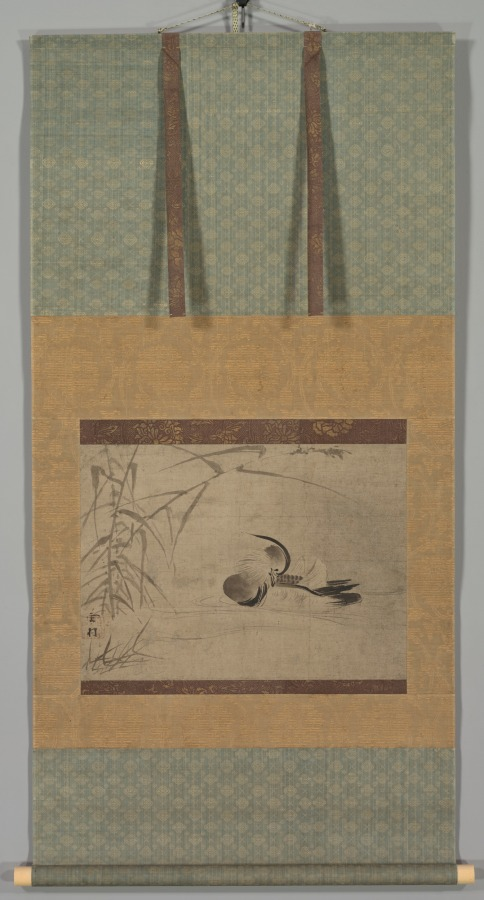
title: Mandarin Duck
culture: Japan, Muromachi period (1392–1573)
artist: Sesson Shūkei (Japanese, c. 1492–c. 1577)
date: 1500s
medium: hanging scroll; ink on paper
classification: Painting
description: In this painting, the artist depicted a scene of a solitary duck floating by reeds in a subtle arrangement of dry and wet, light and dark ink tones which conveys the tranquility of the moment.